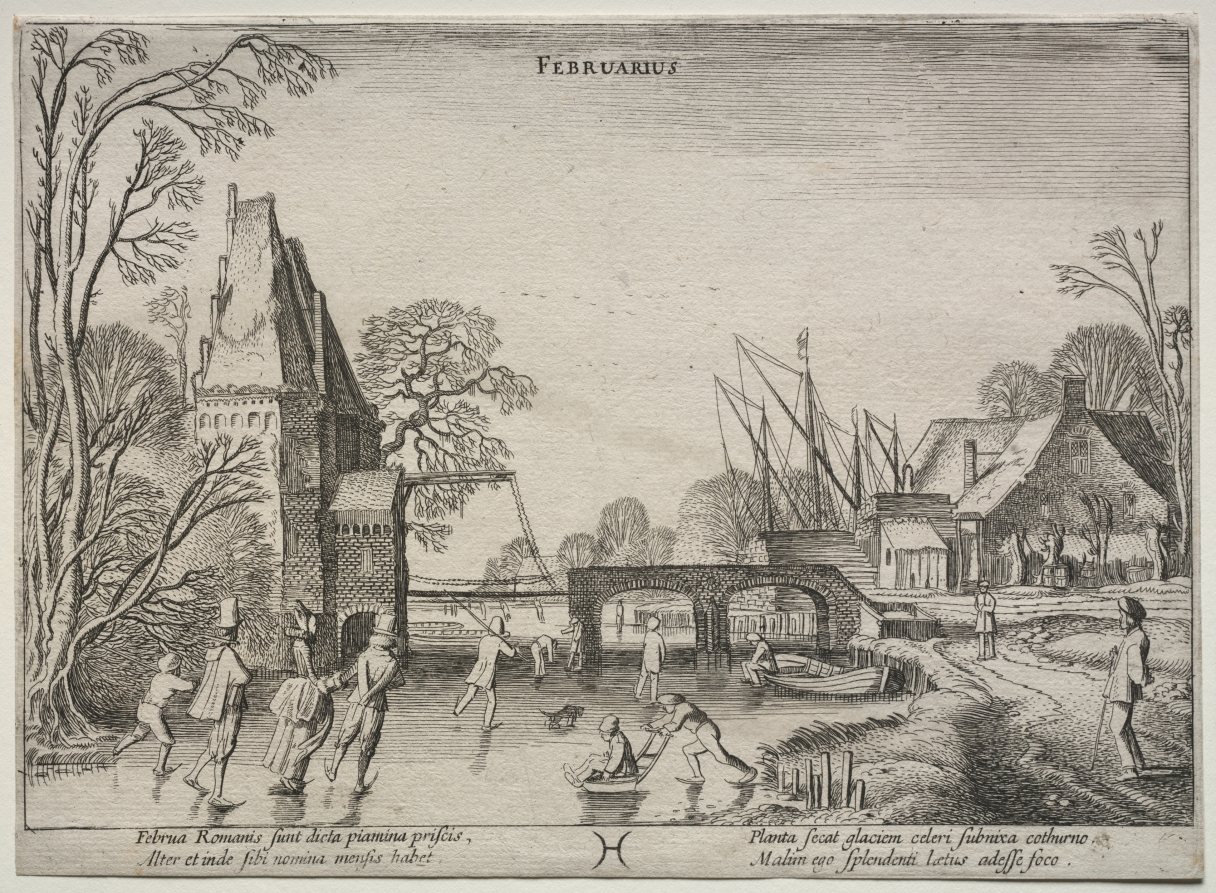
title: The Twelve Months: February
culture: Netherlands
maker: Jan van de Velde II (Dutch, 1593–1641)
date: 1608–18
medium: etching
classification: Print